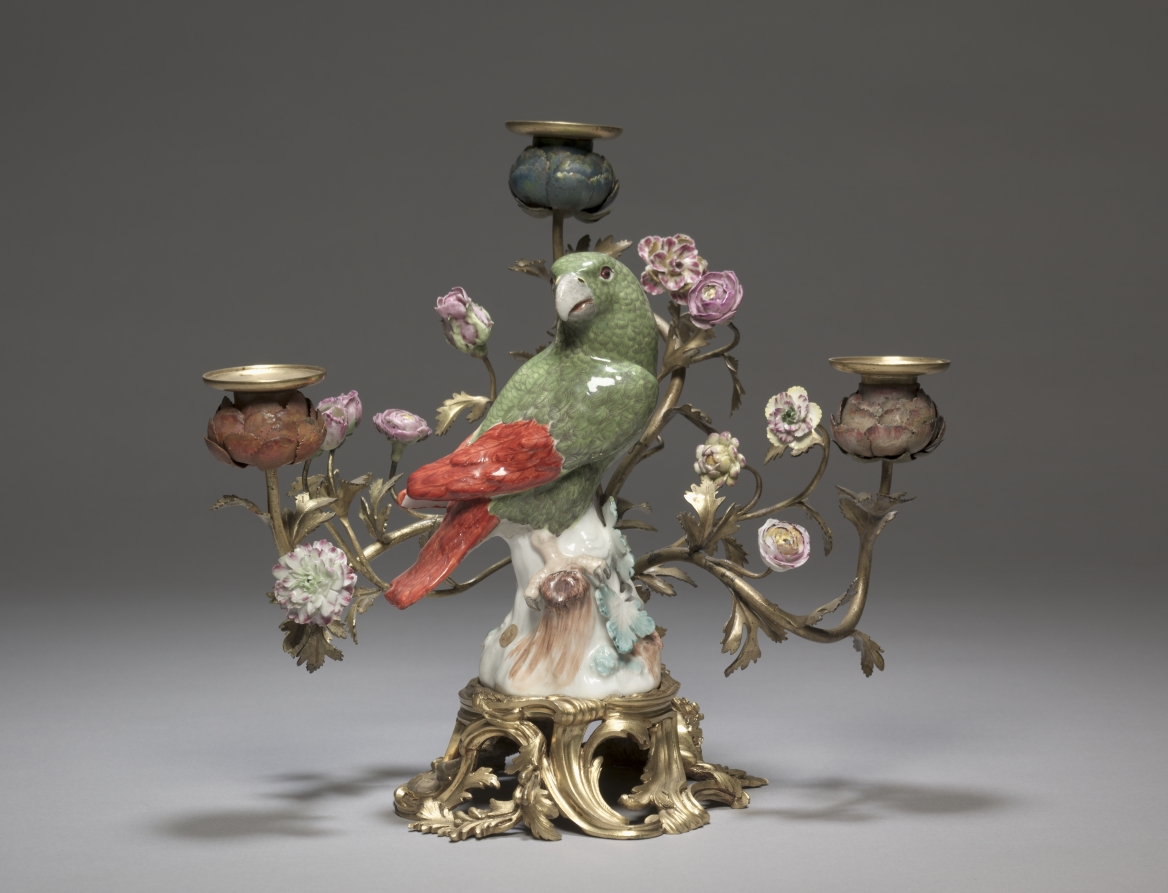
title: Candelabrum with Parrot (Candelabrum)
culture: France, style of Louis XV, 18th century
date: c. 1750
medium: gilt bronze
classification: Furniture and woodwork